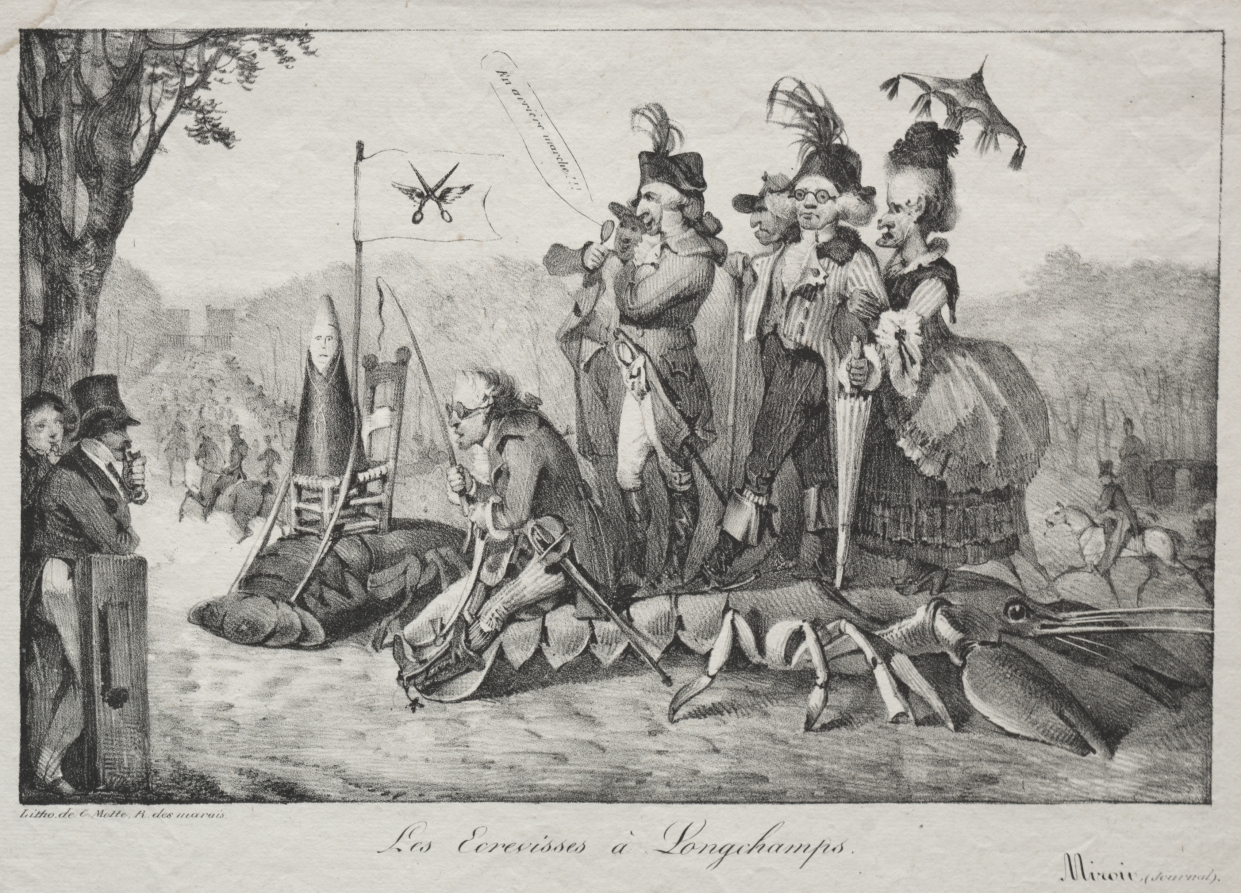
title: The Crayfish of Longchamps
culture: France, 19th century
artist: Eugène Delacroix (French, 1798–1863)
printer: Charles Motte (French, 1785–1836)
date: 1822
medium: lithograph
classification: Print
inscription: lower left, in plate: Litho de C. Motte, R. des marais; center margin, in plate: Les Ecrevisses à Longchamps; lower right, in plate: Miroir (Journal)